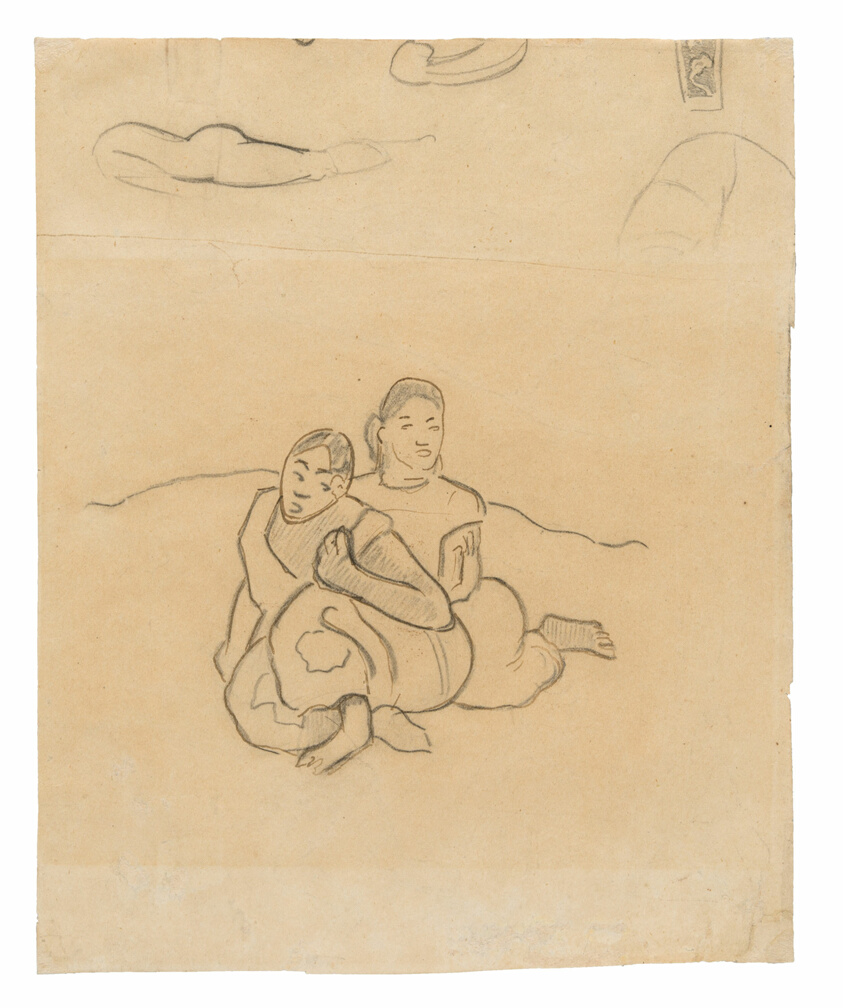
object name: Drawing and Watercolor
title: Seated Tahitian Women (related to the painting Nafea faa ipoipo [When Will You Marry?]) and Other Sketches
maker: Paul Gauguin (French, 1848-1903)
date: 1891/93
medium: Black fabricated chalk and pen and brown ink (originally purple), with traces of graphite on cream wove paper (removed from a sketchbook)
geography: France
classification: graphite; drawings (visual works); prints and drawing